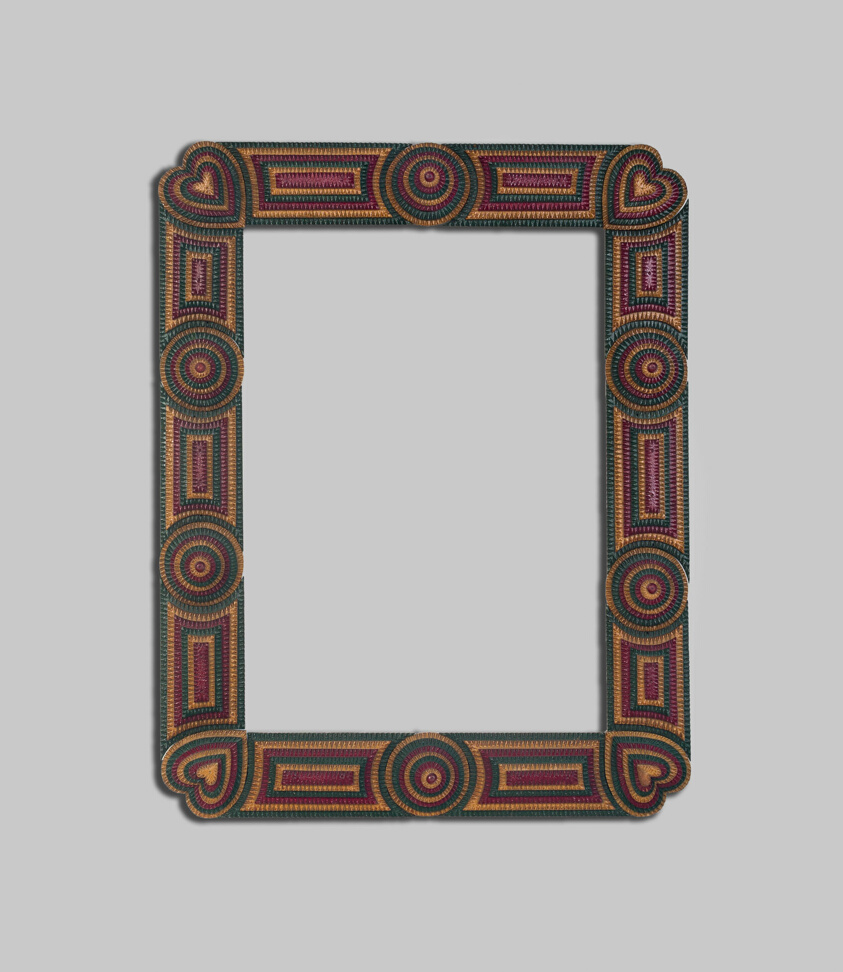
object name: Decorative Arts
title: Frame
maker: Artist unknown (American, active 19th–20th century)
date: c. 1900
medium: Wood and paint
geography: United States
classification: picture frame; wood; american decorative arts; american arts; decorative arts